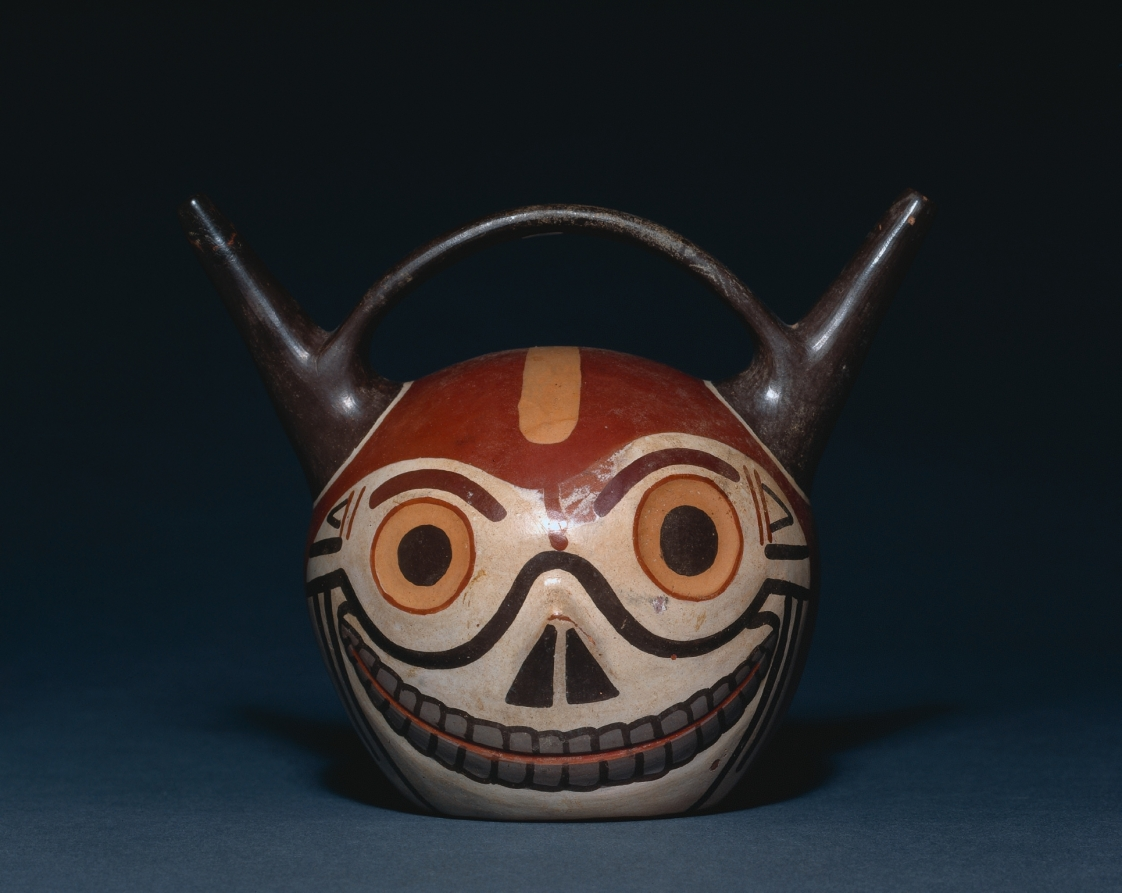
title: Skull Vessel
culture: Wari (Pachacamac) style, Middle Horizon, Epoch 2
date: 500–900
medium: earthenware with colored slips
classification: Ceramic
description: This vessel's clear, vibrant color reveals the inspiration of Wari ceramics in those of the South Coast Nasca. The twin spouts joined by a flat, handle-like bridge are also an old South Coast spout type.